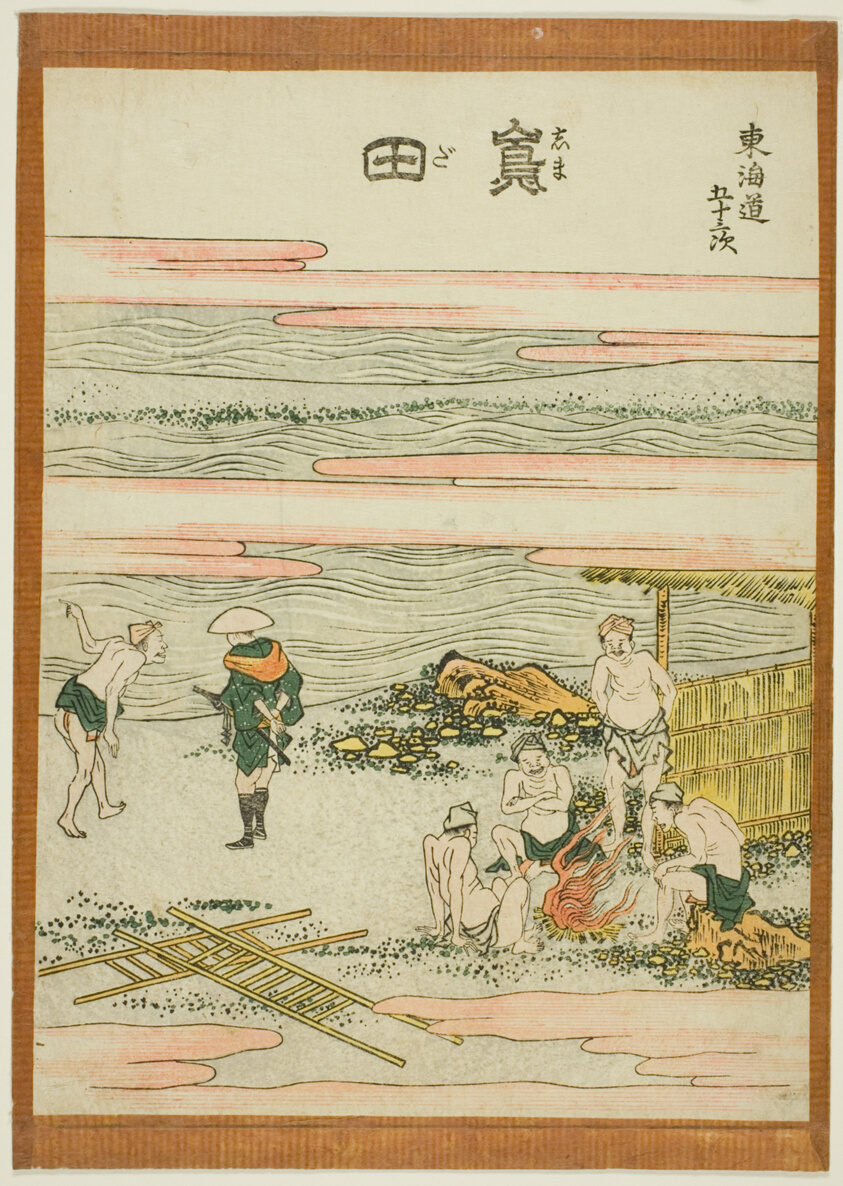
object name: Print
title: Shimada, from the series "Fifty-three Stations of the Tokaido (Tokaido gojusan tsugi)"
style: Japanese (culture or style)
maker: Katsushika Hokusai 葛飾 北斎; Japanese, 1760-1849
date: c. 1806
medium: Color woodblock print; chuban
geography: Japan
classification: woodblock print; print; asian art